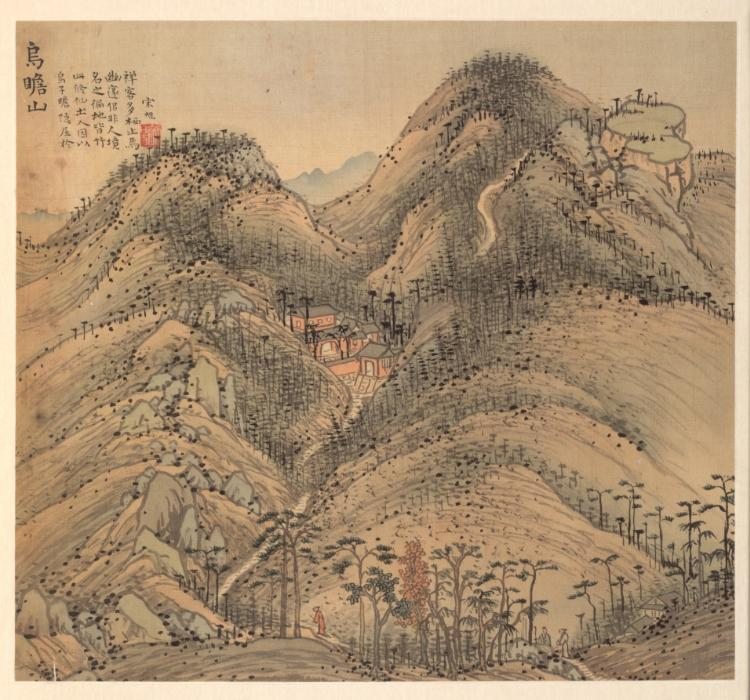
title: Mt. Wuzhan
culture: China, Jiaxing, Ming dynasty (1368–1644)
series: Eighteen Views of Huzhou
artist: Song Xu (Chinese, 1525-c. 1606)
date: c. 1588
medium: Album leaf; ink and color on silk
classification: Painting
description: By the 1500s, visits to historic and scenic sites in the lower Yangzi delta stimulated an increase of printed illustrated travel books. Topographical depictions of local scenery flourished. Leaves from this album illustrates sites around Lake Tai of the two adjacent counties Changxing and Wuxing (modern Huzhou). Song Xu, who lived intermittently in Jiaxing and Songjiang, must have passed through Wuxing by boat and thus knew the region. The paintings are inscribed with gazetteerlike notations, suggesting that the album was produced for clients as commemorative works, a travel guide, or for “armchair travel” (woyou) in one’s mind.